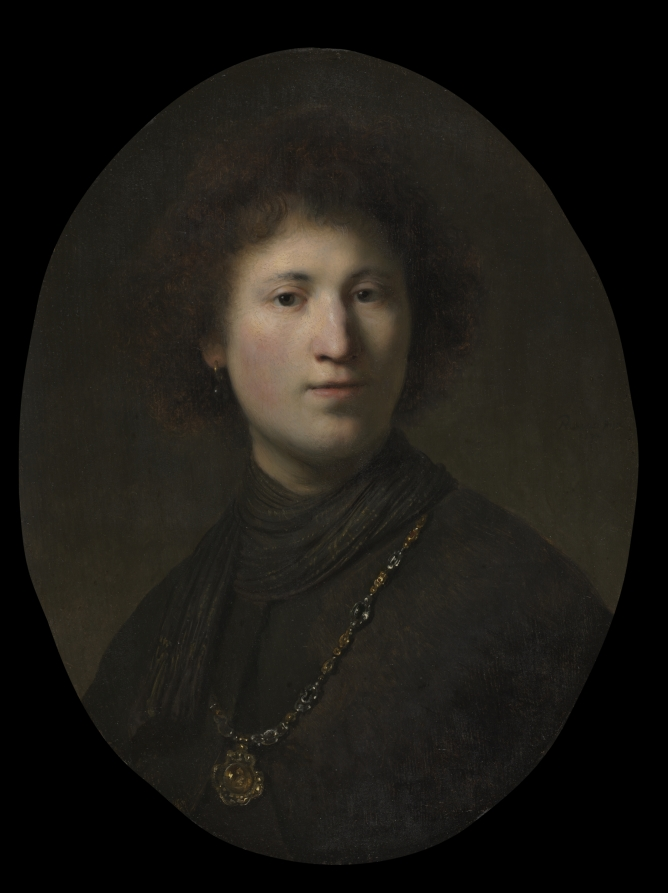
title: A Young Man with a Chain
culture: Netherlands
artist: Rembrandt van Rijn (Dutch, 1606–1669)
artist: and Studio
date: c. 1629 or 1632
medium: oil on wood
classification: Painting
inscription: Signed at right: "RHL van Rijn / 1632 [RHL in monogram]"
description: This painting is an example of a tronie, a Dutch word meaning “head” or “facial expression.” Tronies were not intended to be identifiable portraits, but artistic investigations of facial appearance and fanciful costume. Particularly in the years around 1630, Rembrandt used this popular format to explore different lighting effects and facial expressions. Here, the strong contrast of light and shade shapes the contours of the young man’s face; unusual accessories such as the striped scarf and glittering pendant on a jeweled chain add an exotic touch. Although this painting bears Rembrandt’s monogram, the authorship is not certain. Some scholars have attributed it to Isaac de Joudreville (1613–1648), a pupil and associate of Rembrandt who painted comparable tronies in a similarly smooth and elegant style.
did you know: Once identified as Rembrandt himself, the sitter is now considered an anonymous study of human character.